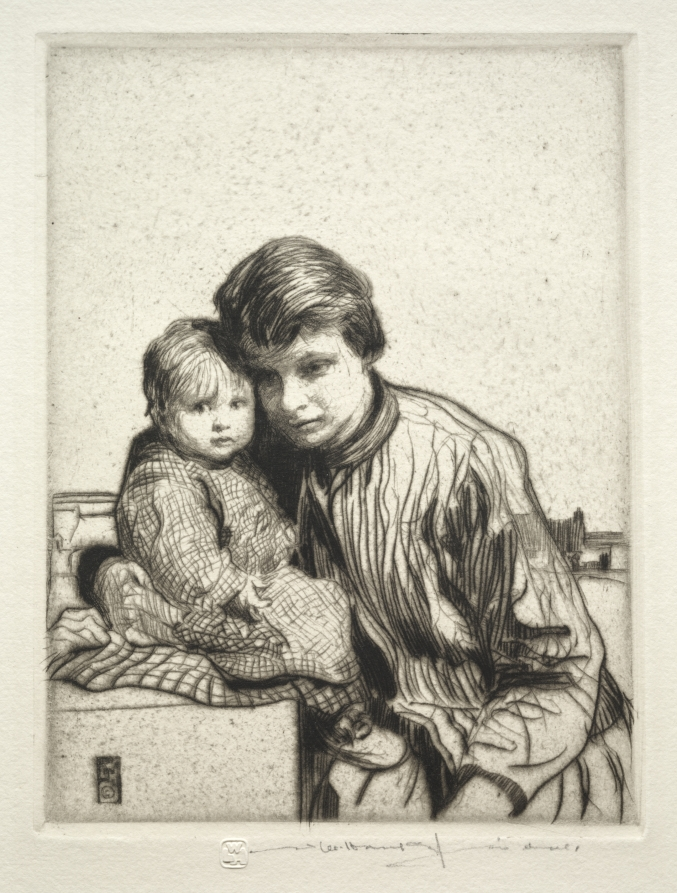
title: Sur le Quai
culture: England, 20th century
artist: William Lee Hankey (British, 1869–1952)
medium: drypoint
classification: Print